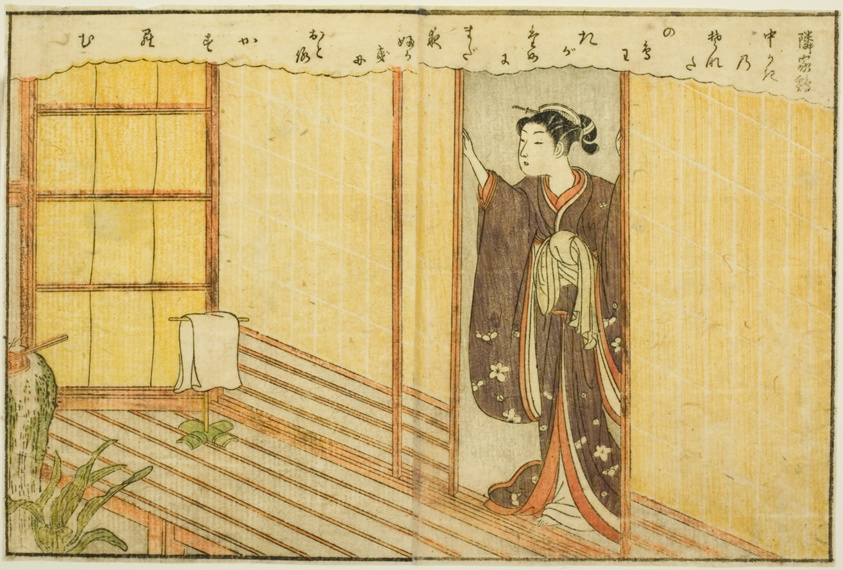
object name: Print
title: Double-page Illustration from Vol. 2 of "Picture Book of Spring Brocades (Ehon haru no nishiki)"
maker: Suzuki Harunobu 鈴木 春信; Japanese, 1725 (?)-1770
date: 1771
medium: Color woodblock print; double-page illustration from book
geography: Japan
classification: woodblock print; print; asian art